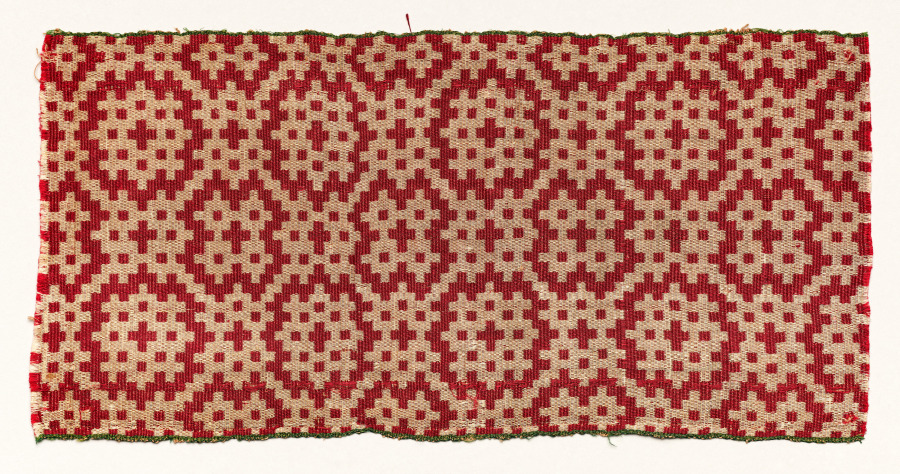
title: Fragment of a furnishing textile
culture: Africa, North Africa, Morocco, Moroccan weaver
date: 1800s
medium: Silk, dye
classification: Textile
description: This textile fragment is woven using one silk warp (vertical thread) and multiple silk wefts (horizontal threads), creating a red and white pattern. The fragment was likely once part of a furnishing textile, perhaps used to cover a pillow or other household object.